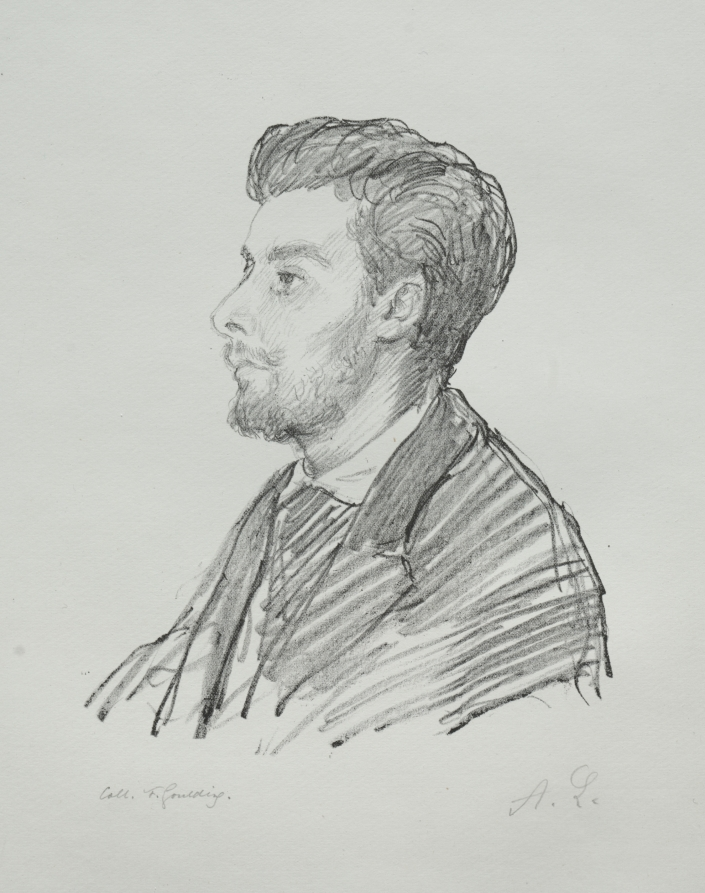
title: Frédéric Régamey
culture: France, 19th century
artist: Alphonse Legros (French, 1837–1911)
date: c. 1857–1911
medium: lithograph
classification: Print